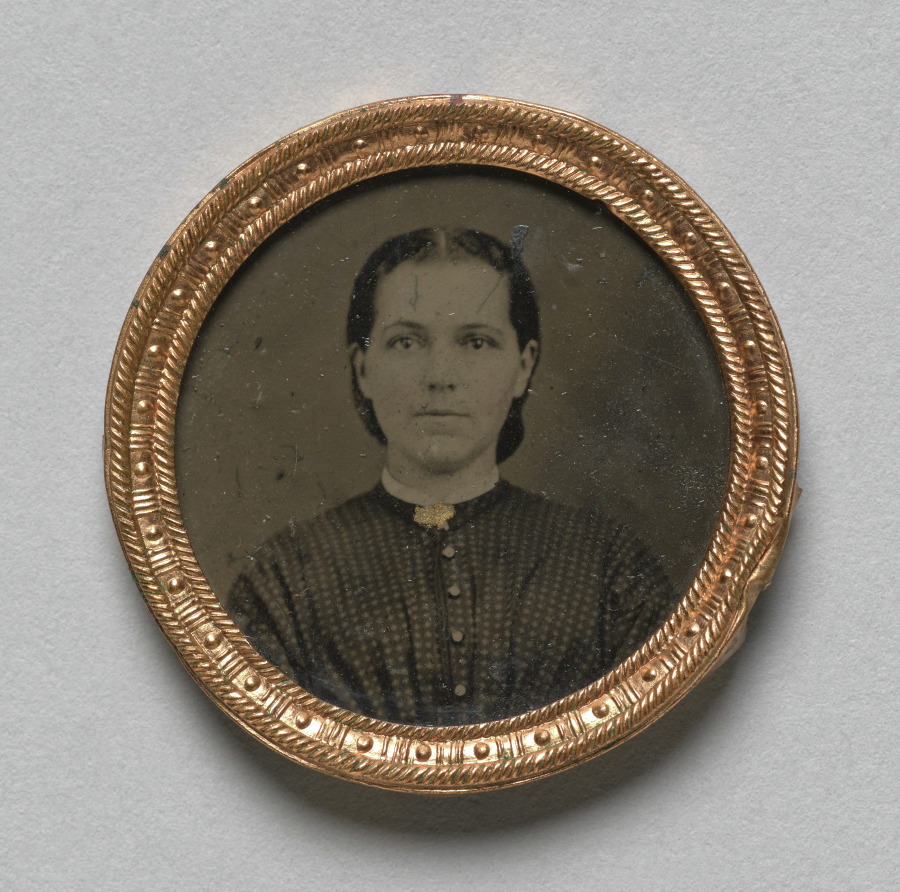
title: Portrait of a Young Woman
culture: America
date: c. 1855–60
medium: Tintype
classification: Photograph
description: It seemed a miracle that anyone could afford to have an accurate record of their own likeness or those of their loved ones. This portrait is an excellent example of the hundreds of thousands of portraits produced by commercial photographers in mid-nineteenth-century America. Small scale yet housed in an elaborately decorated thermoplastic case, it was intended to be carried by its owner or displayed on parlor tables or knickknack shelves.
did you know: During the first decades of photography, portraits far outnumbered every other type of image.